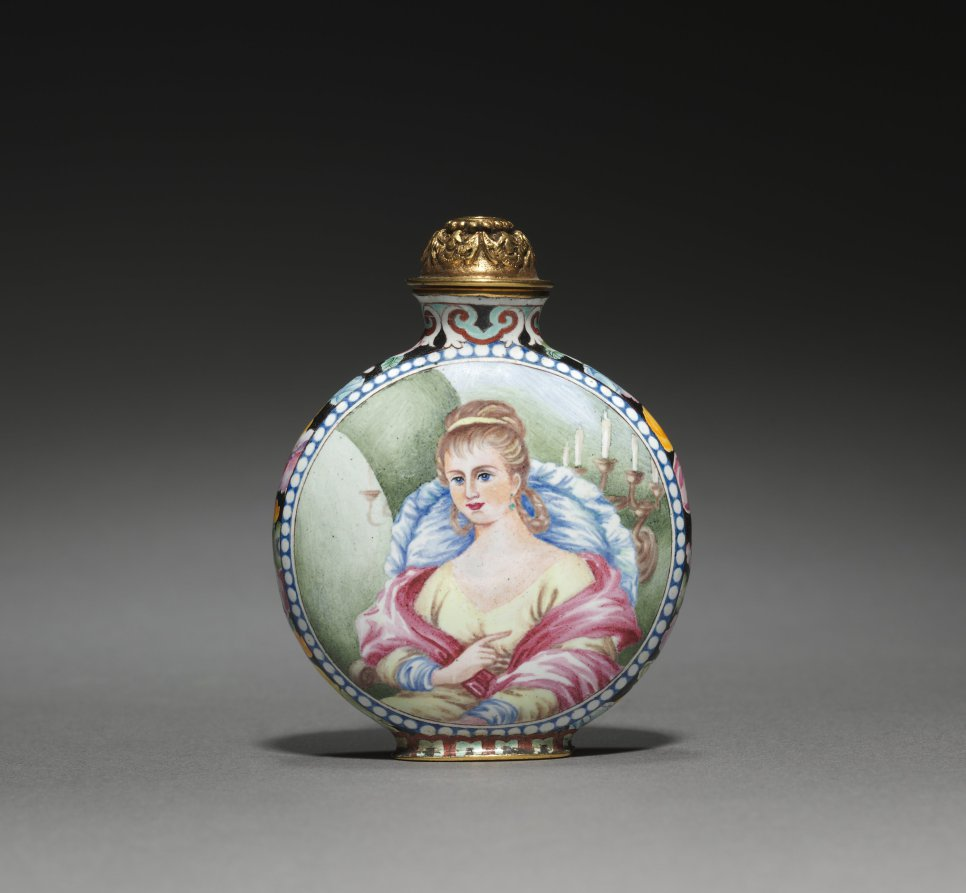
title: Snuff Bottle with European Figures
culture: China, Qing dynasty (1644-1911), Qianlong mark and reign (1736-95)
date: 1736–95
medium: painted enamel on copper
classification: Enamel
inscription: 乾隆年製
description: Snuff bottles were introduced from Europe to China around the 1700s to hold portable snuff or medicine.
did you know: The stopper is decorated with bats, which traditionally symbolize good luck, since both words (蝠 and 福) are both pronounced as fu in Chinese.